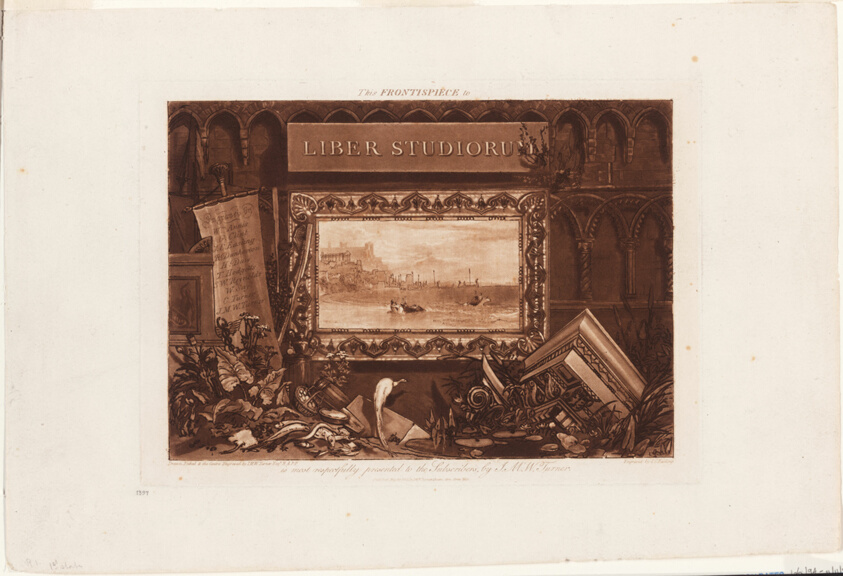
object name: Print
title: The Frontispiece to Liber Studiorum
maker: Joseph Mallord William Turner (English, 1775-1851); border engraved by J.C. Easling (British, active 19th century)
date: Published May 23, 1812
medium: Mezzotint and etching in brown on ivory wove paper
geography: England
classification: etching; print; prints and drawing